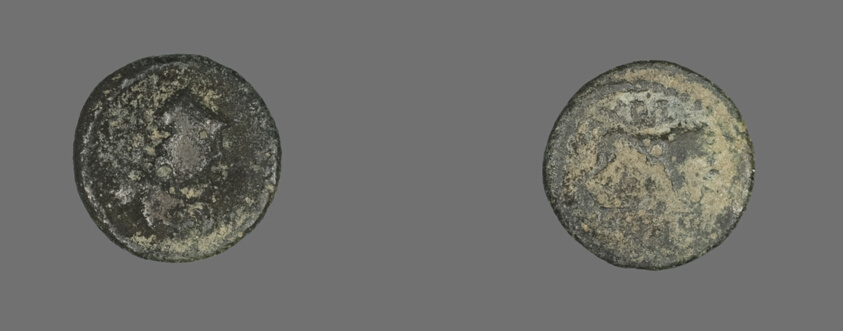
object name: Coin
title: Coin Depicting a Lion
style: roman (ancient, style or period)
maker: Roman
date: 193-211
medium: Bronze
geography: Roman Empire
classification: coin; ancient art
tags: lions